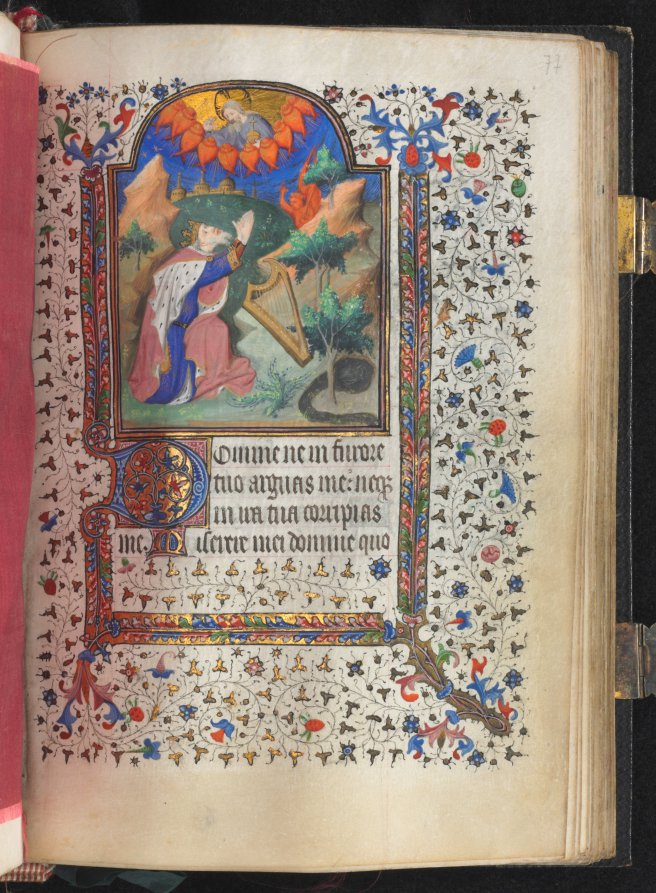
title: Book of Hours (Use of Paris): Fol. 77r, David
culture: France, Paris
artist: possibly studio or workshop of The Bedford Master (French, Paris, active c. 1405–30)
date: c. 1420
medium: ink, tempera, and gold on vellum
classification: Bound Volume